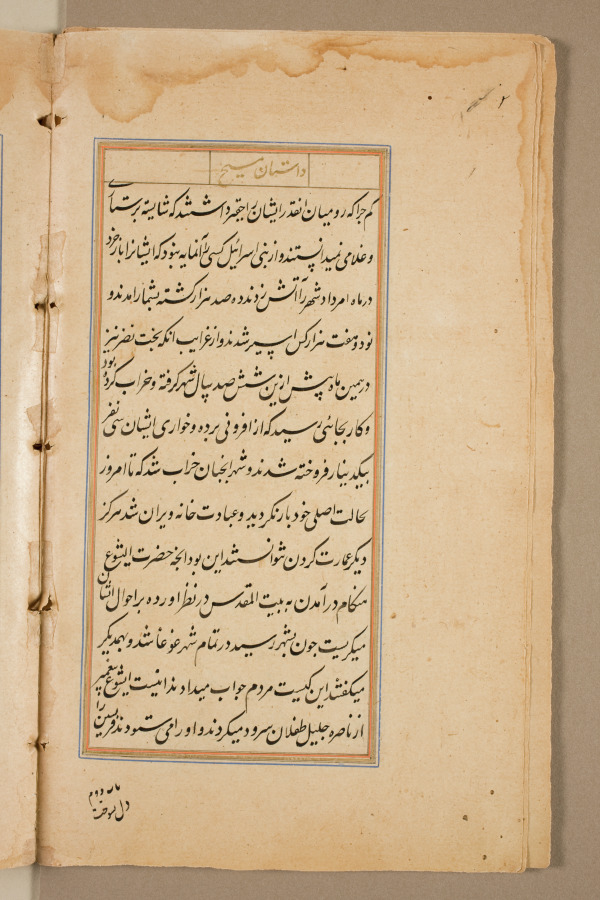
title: Text page from a Mirror of Holiness (Mir’at al-quds) of Father Jerome Xavier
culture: Mughal India, Allahabad, made for Prince Salim (1569–1627)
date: 1602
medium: Ink and gold on paper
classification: Manuscript